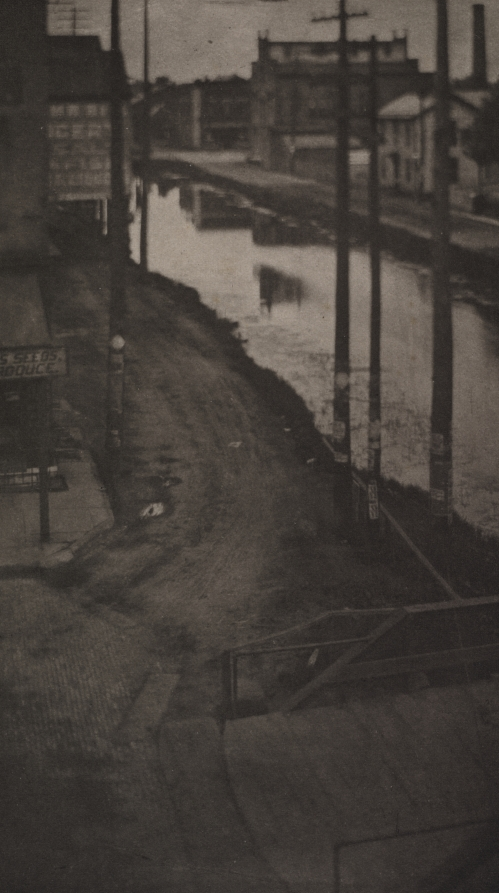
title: Telegraph Poles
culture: America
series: Camera Work No. 3, July, 1903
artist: Clarence H. White (American, 1871–1925)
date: 1898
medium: photogravure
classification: Photograph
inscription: Written in pencil on recto of photo: "Clarence H. White [signed] '02 [?]"; in pencil on verso: "17 [circled]", " 'Along the Canal' by Clarence H. White / Newark Ohio / This canal was behind / the wholesale grocery / store of Fleek Company // where Clarence White worked / as bookkeeper--"